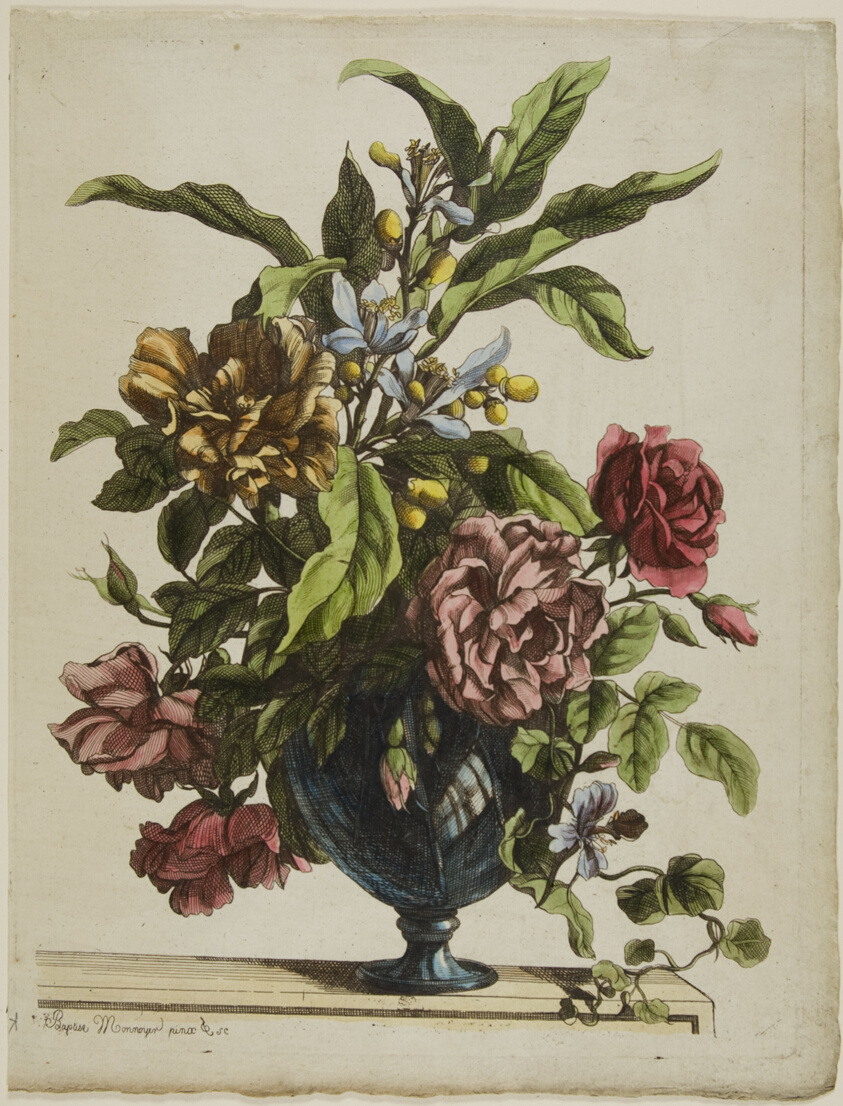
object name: Print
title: Vase of Flowers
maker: Jean Baptiste Monnoyer (French, 1636-1699)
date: 1660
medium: Etching in black, with hand-coloring, on ivory paper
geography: France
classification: etching; print; prints and drawing